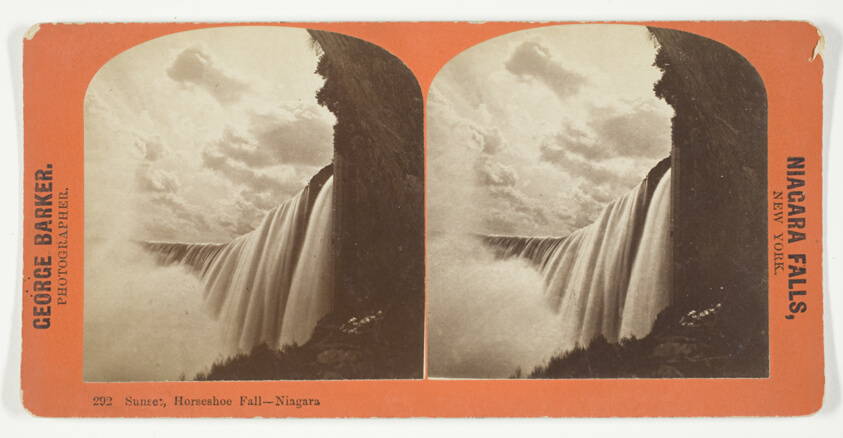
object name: Photograph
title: Sunset, Horseshoe Fall - Niagara, No. 292 from the series "Niagara Falls, New York"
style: 19th century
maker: George Barker (American, born Canada, 1844–1894)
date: 1850/94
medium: Albumen print, stereo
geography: New York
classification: stereograph (albumen); albumen silver print; photographic process; photography; photograph